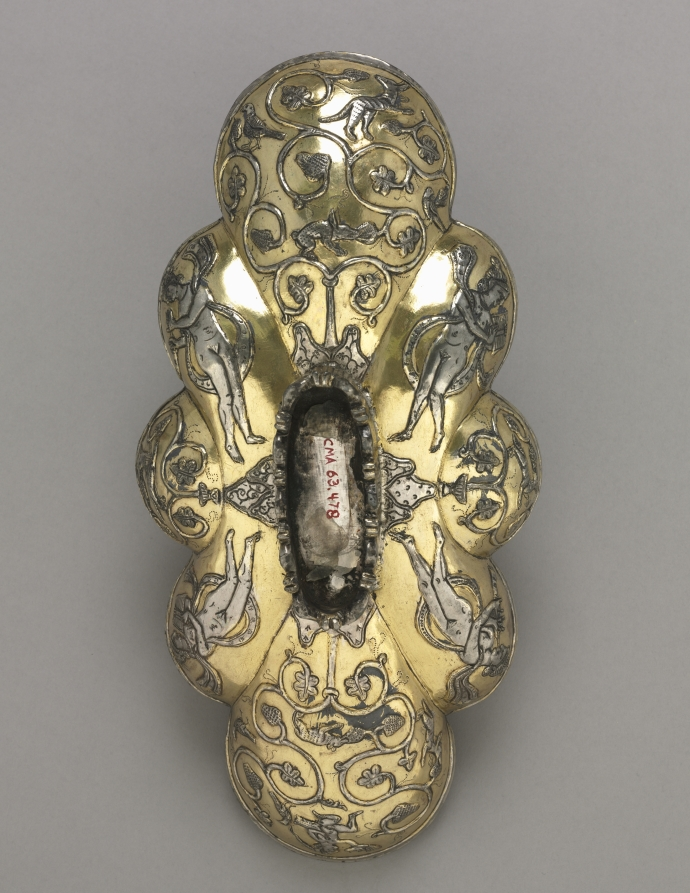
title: Bowl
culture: Iran, Sasanian Empire (224–651 CE)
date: 300–500 CE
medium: silver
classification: Metalwork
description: The decoration on this bowl—a vine with a little nude, accompanied by musicians drinking wine from a rhyton—is related to the Hellenistic cult of Dionysos, or Bacchus, which was brought to Iran by the Greeks and became absorbed into the cult of Anahita.